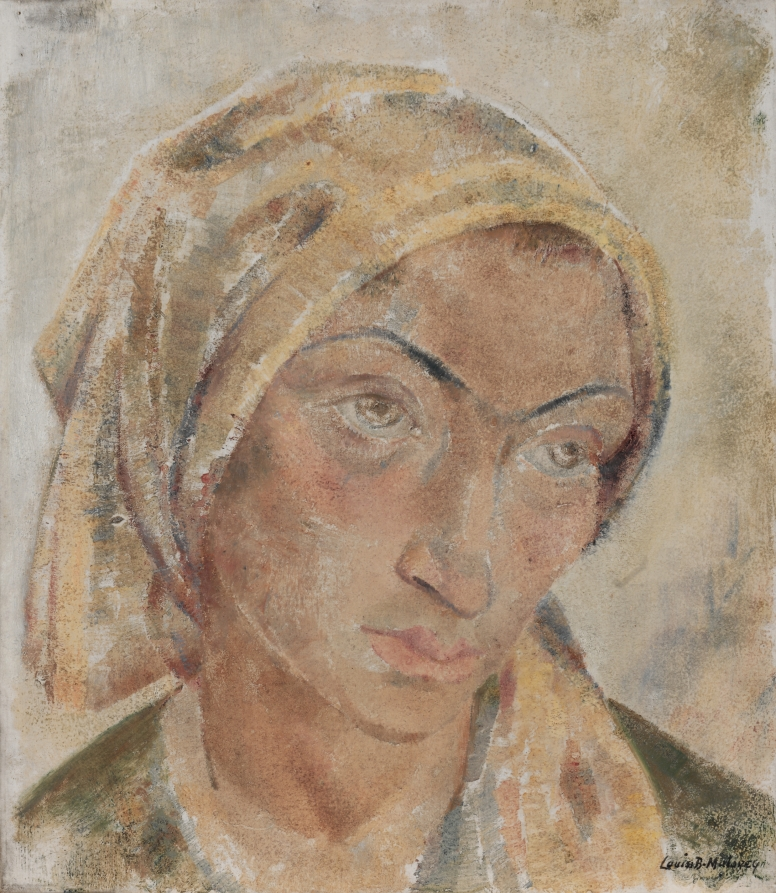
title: Antonia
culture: America, Ohio, Cleveland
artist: Louise B. Maloney (American, 1887–1973)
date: 1923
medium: oil on canvas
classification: Painting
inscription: signed lower right: Louise B. Maloney.